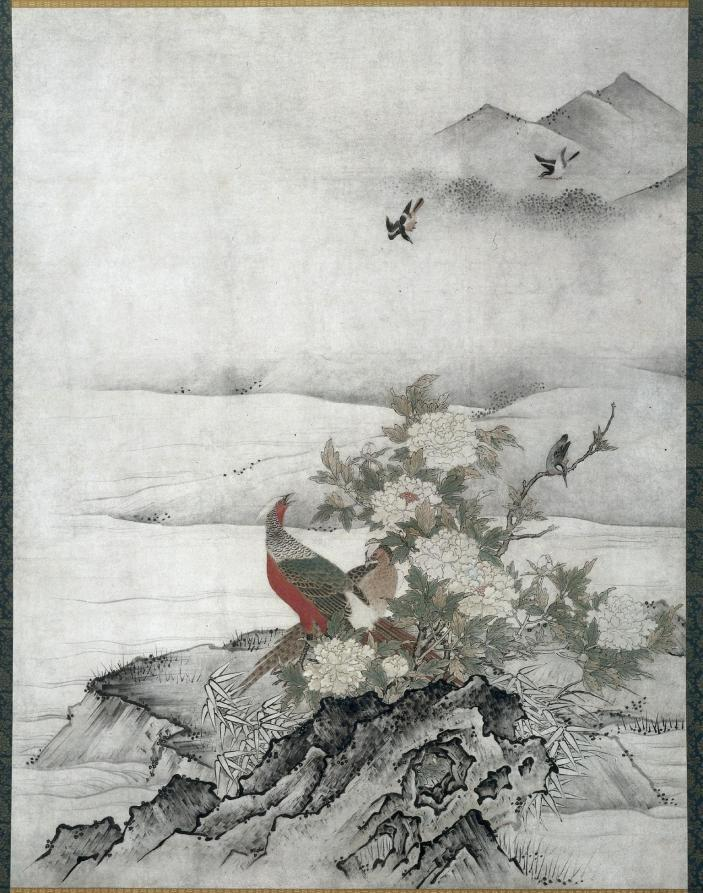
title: Flowers and Birds in a Spring Landscape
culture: Japan, Muromachi period (1392–1573)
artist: attributed to Kano Motonobu (Japanese, c. 1476–1559)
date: 1500s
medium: One of a set of sliding door panels mounted as hanging scrolls; ink and color on paper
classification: Painting